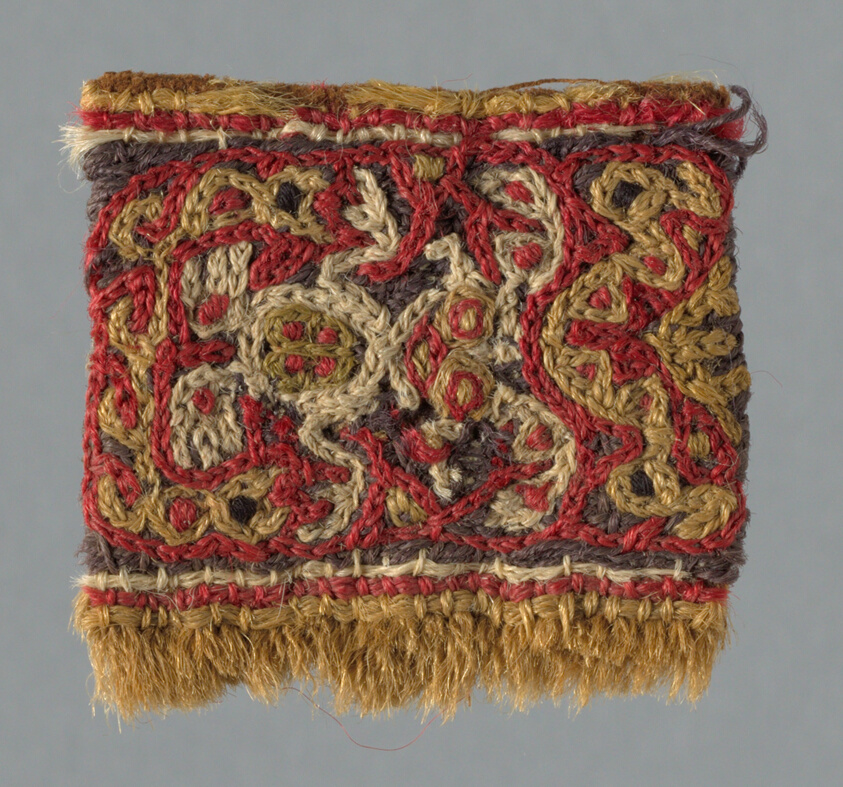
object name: Textile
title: Ornamental Tab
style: peruvian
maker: Peru, Possibly central coast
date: 1000/1476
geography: Peru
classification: textile; weaving